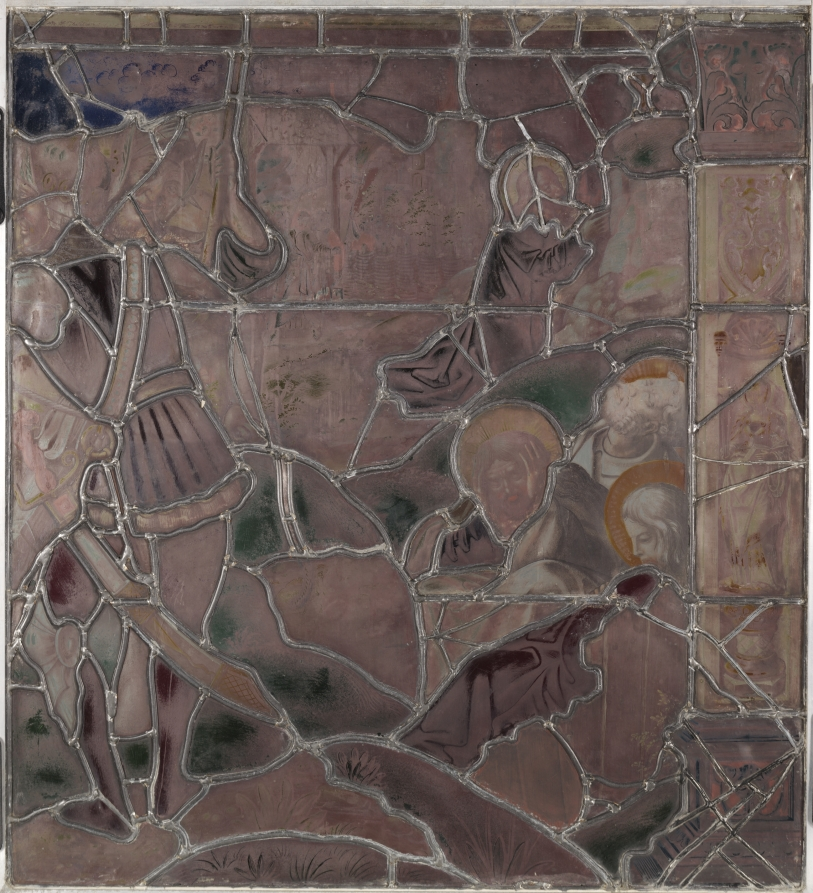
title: Christ in the Garden of Gethsemane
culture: Germany, Cologne, 16th century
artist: Everhard Rensig (German)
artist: or Gerhard Remisch (German)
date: 1522–26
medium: pot-metal and white glass, silver stain and sanguine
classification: Glass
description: These two stained glass panels originally belonged to an extensive program of Old and New Testament subjects that originally decorated the cloister of the Cistercian Abbey of Mariawald, near Cologne, Germany. The original placement of glass at Mariawald involved windows composed of two openings. Each comprised three large glass panels plus a smaller tracery panel. Two scenes in each window represented Old Testament subjects (below) and the New Testament (above). Above the biblical narrative panels were smaller messenger panels depicting images of prophets with scrolls. At the base of each window were donor and patron saint panels. In this way, the Old Testament was shown to prefigure the events of the New. These two panels depicting scenes of Christ’s Passion were originally located in the north corner of the east cloister gallery with the Kiss of Judas on the left, and Christ in Gethsemane on the right. Mariawald was founded in 1480 and closed in 1802 when the stained glass windows were removed. Other panels from the series are preserved in the Victoria and Albert Museum, London. Recent scholarship has attributed the glass to the Rhenish glass painters Everhard Rensig or Gerhard Remisch.